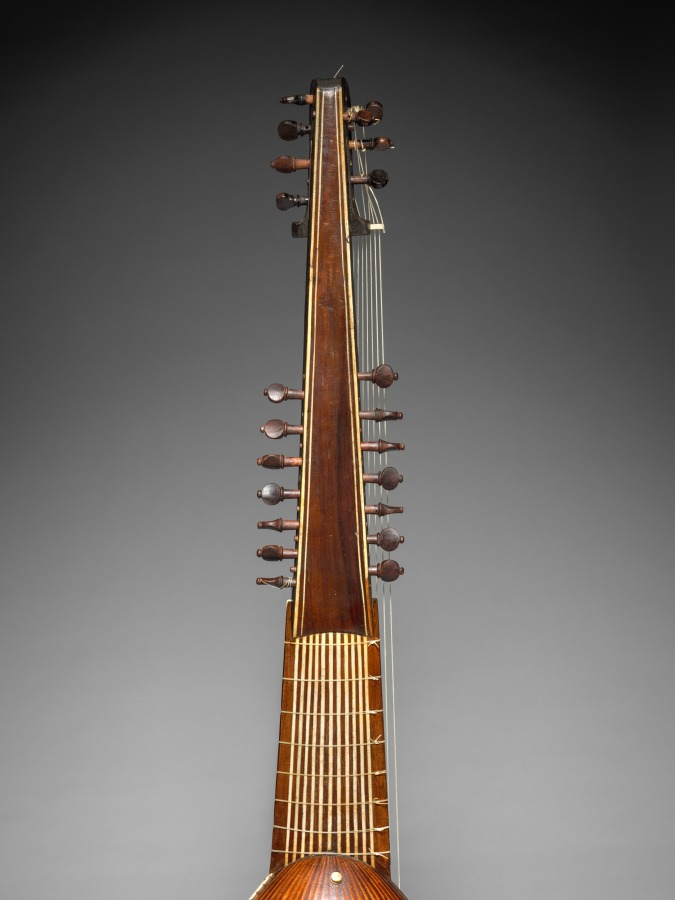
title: Lute or Tiorbino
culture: Italy, probably made in the mid-17th century, but modified by later repair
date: c. 1620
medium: wood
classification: Musical Instrument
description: The lute was the most important musical instrument in secular settings throughout the 16th and 17th centuries. Not only a virtuoso instrument with a huge repertoire, the lute provided the ideal accompaniment for the voice, played an essential role in ensembles, figured in masques and operas, and was played by amateurs as well as professionals. A highly specialized instrument, this tiorbino is a type of long-necked lute resembling a theorbo, but significantly smaller and pitched an octave higher. An object of great rarity, it is one of the smallest Baroque tiorbinos to survive.